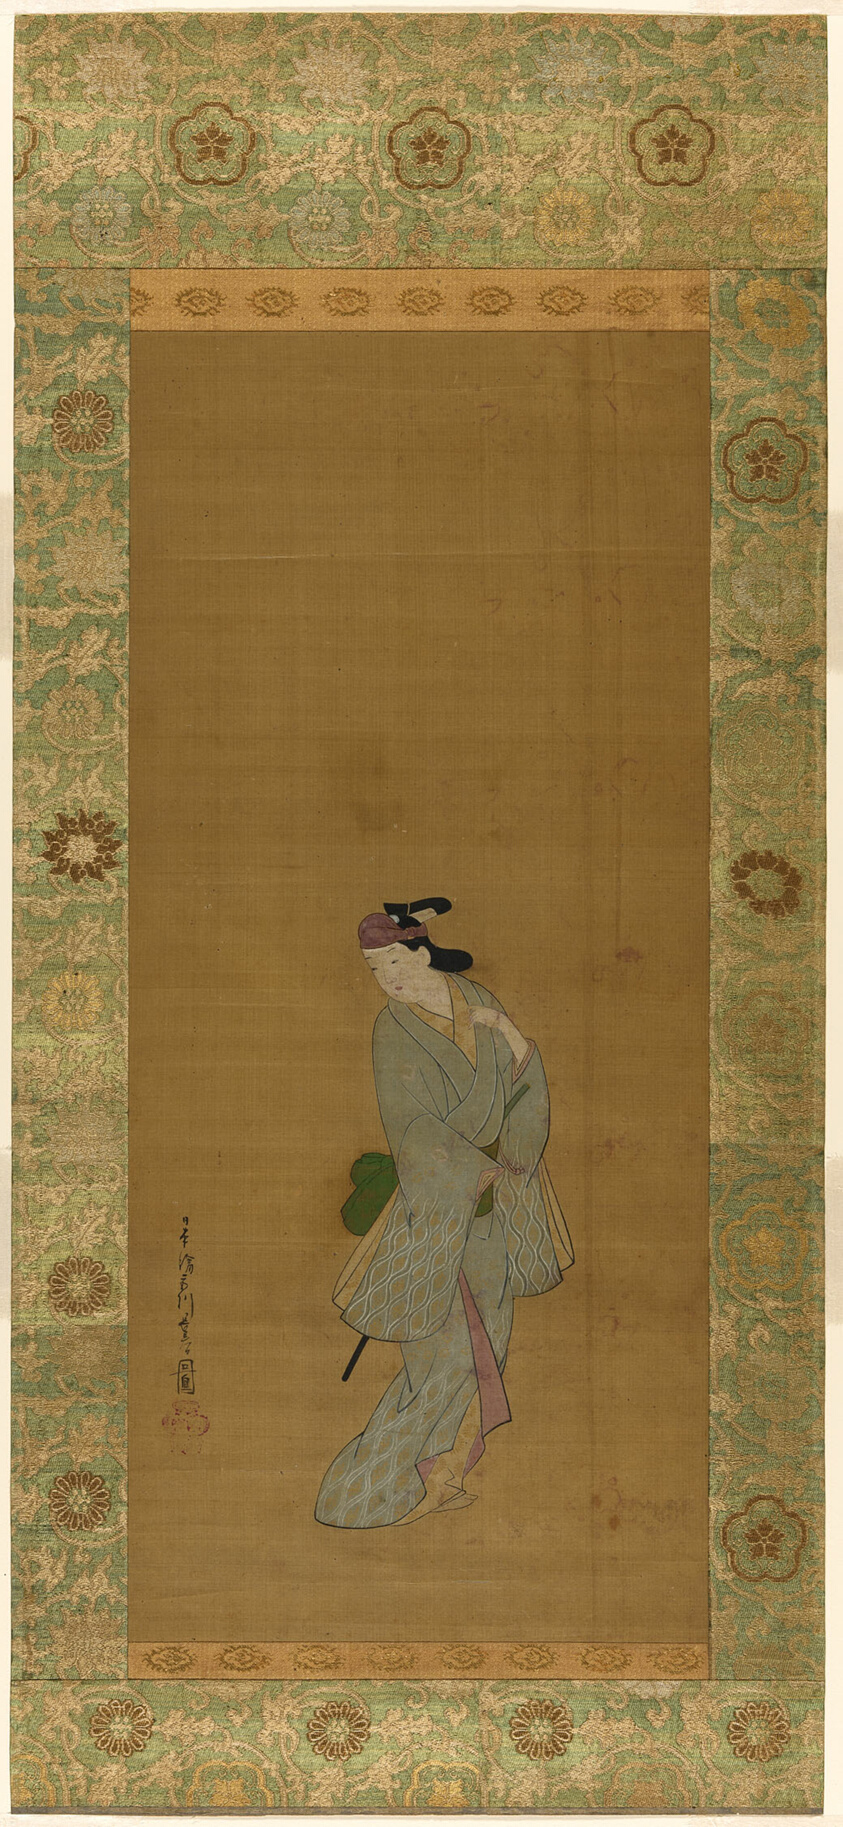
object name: Painting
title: Male Figure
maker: Miyagawa Choshun; Japanese, 1683-1753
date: Edo period (1610–1868)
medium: Hanging scroll cut from rollers; ink and colors in silk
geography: Japan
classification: hanging scroll; painting; asian art